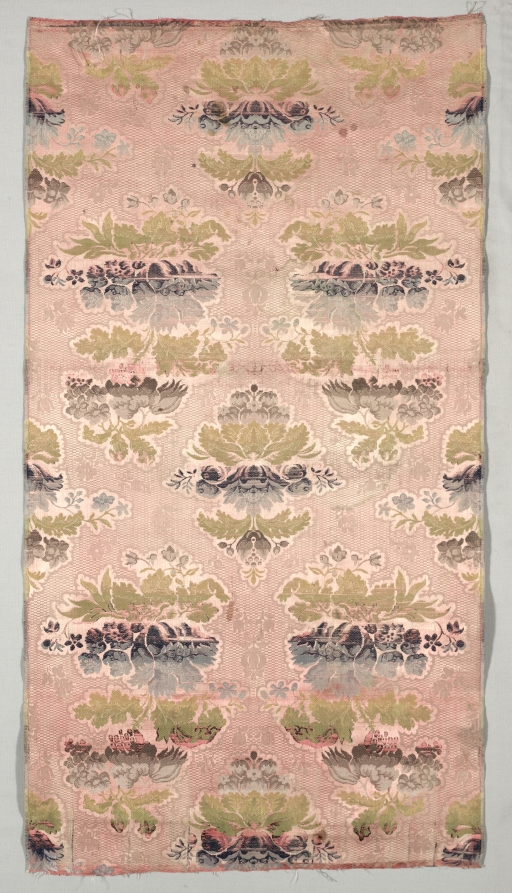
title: Length of Silk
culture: Italy, 18th century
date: 1700s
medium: lampas weave, silk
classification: Textile